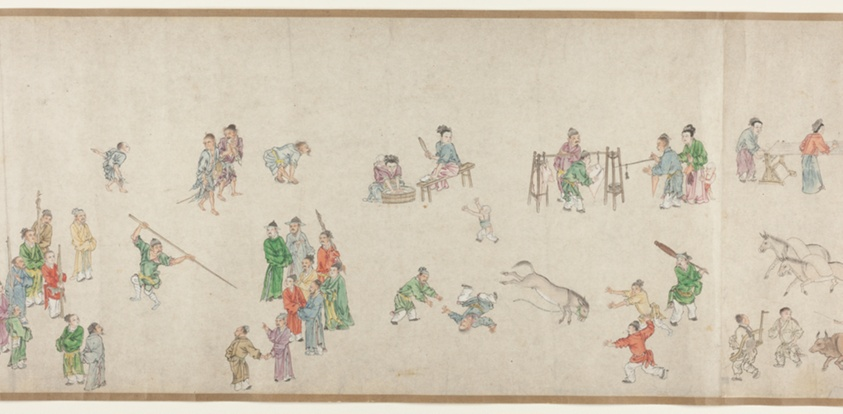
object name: Painting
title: Street Scenes in Times of Peace 太平風會圖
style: Chinese (culture or style)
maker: Zhu Yu (Zhu Junbi) 朱玉（朱君璧）; Chinese, 1293-1365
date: Yuan dynasty (1279–1368), 14th century 元朝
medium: Handscroll; ink and colors on paper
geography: China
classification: handscroll; painting; asian art